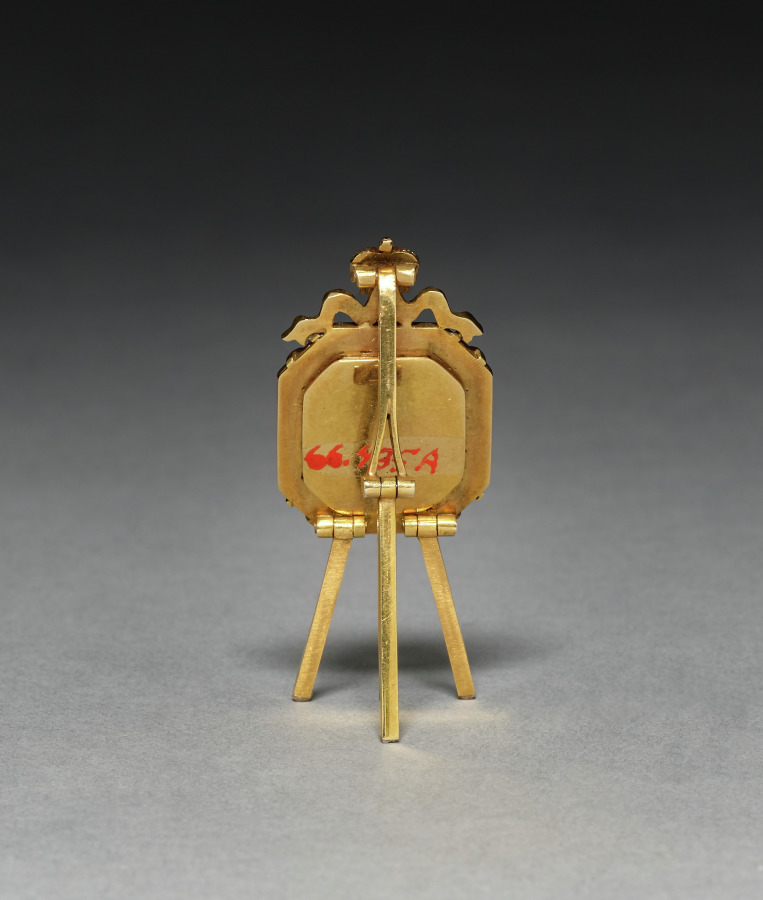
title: Gold Easel and Photograph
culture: Russia, St. Petersburg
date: before 1896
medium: gold, enamel, sapphire, gold easel and stand, photograph covered with faceted green glass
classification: Miscellaneous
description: In the Russian Orthodox religious tradition, eggs are offered as Easter gifts to symbolize rebirth, renewal, and the resurrection of Christ. This jeweled Russian egg is engraved with XB symbolizing the phrase, “Christ is risen,” and would have been given to a lady in a wealthy household, perhaps someone of high rank within the imperial court, given the richness of materials.